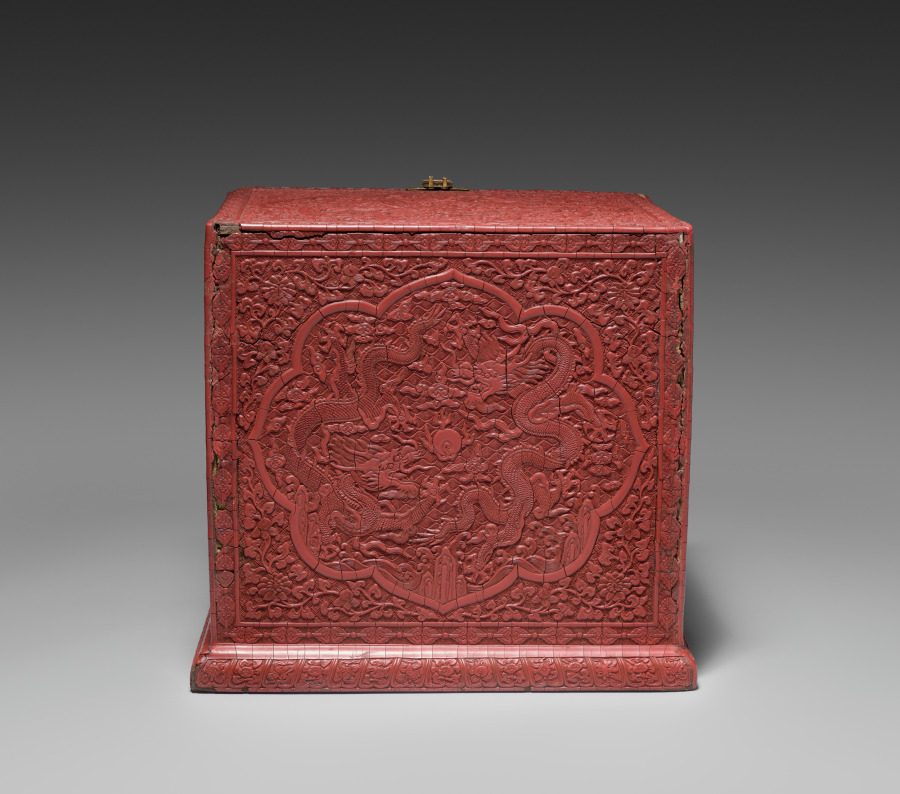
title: Tihong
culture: China, Ming dynasty (1368-1644), Wanli reign (1572-1620)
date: 1585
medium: carved cinnabar lacquer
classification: Lacquer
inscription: 大明萬曆乙酉年製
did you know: An inscription on the base of the chest dates it to 1585.